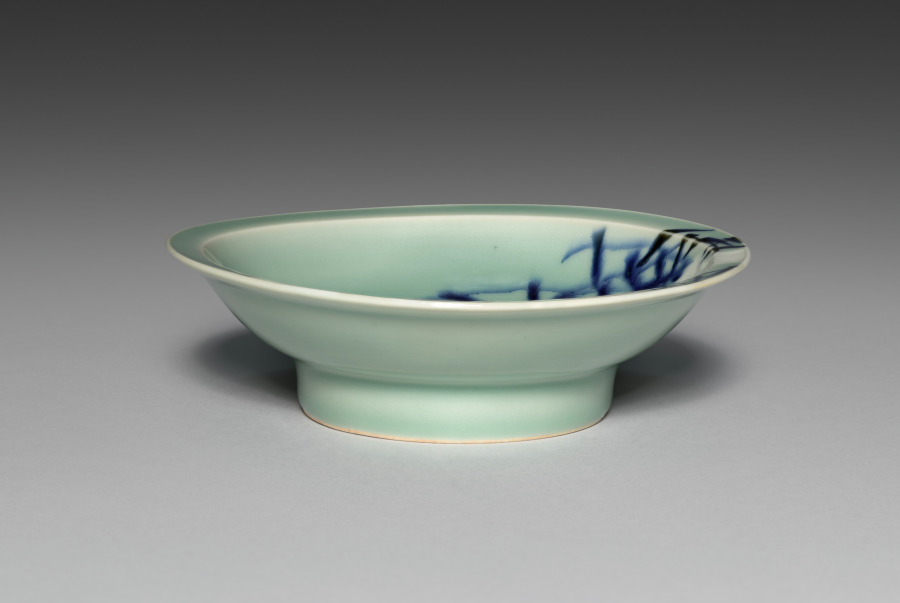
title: Small Dish (Kozara) with Waves and Reeds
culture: Japan, Edo period (1615–1868)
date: late 1600s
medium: Porcelain with underglaze blue and celadon (Hizen ware, Nabeshima type)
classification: Ceramic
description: This dish has a green glaze often called celadon in English.